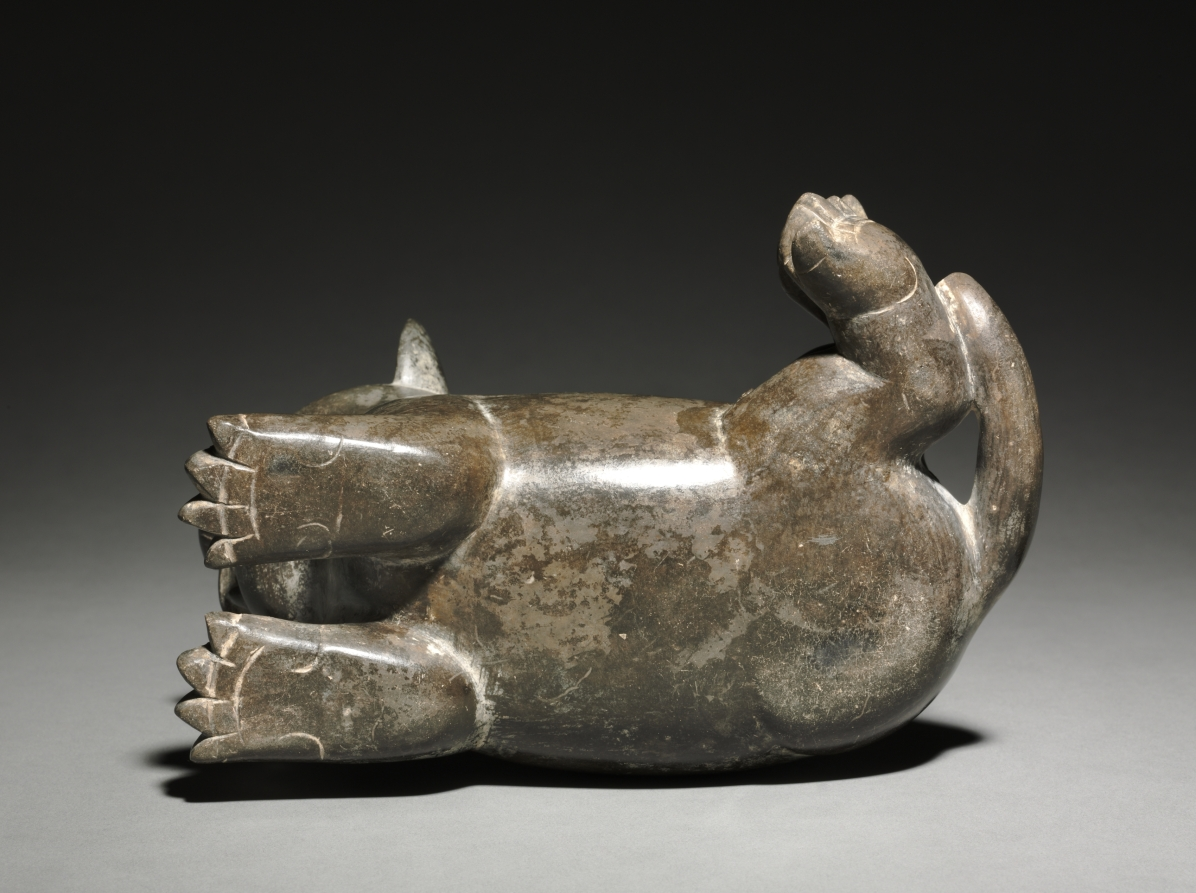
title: Feline Vessel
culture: Central Andes, North Coast, Moche people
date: 200–850 CE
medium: ceramic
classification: Ceramic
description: This darkware vessel is early Moche and demonstrates the transition from earlier North Coast cultures, which used smudge firing and post-fire pigmentation, to Moche times, which saw the adoption of new, higher-oxygen firing technologies and the use of slips applied before firing.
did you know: The Moche were known for their fine animal representations.